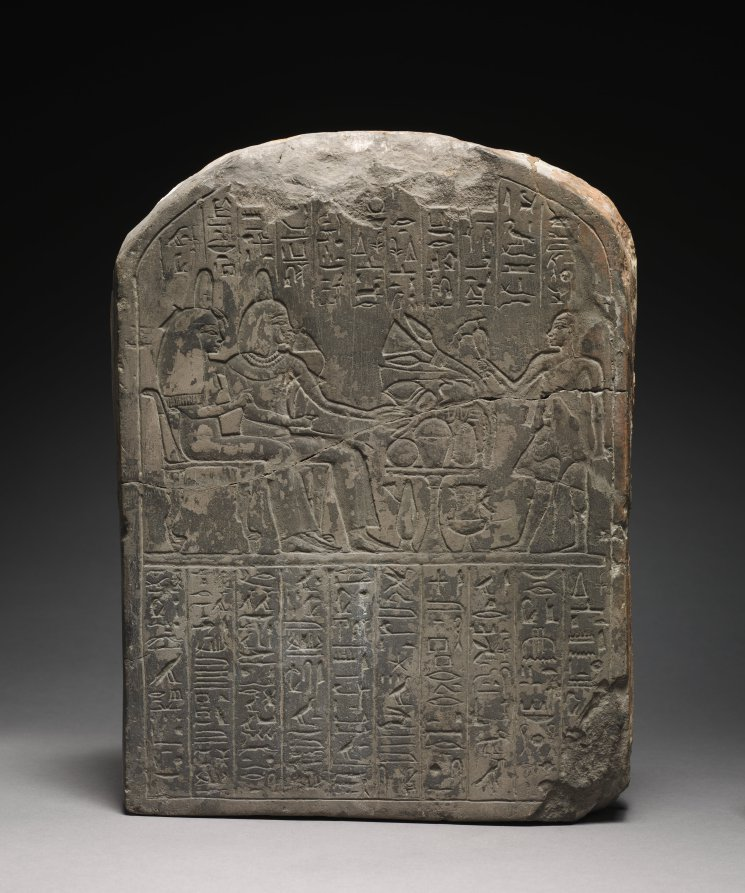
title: Stele of Userhat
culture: Egypt, Probably Thebes, New Kingdom, Dynasty 18, reign of Amenhotep III, 1391-1353 BC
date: 1391–1353 BCE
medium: limestone, originally painted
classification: Sculpture